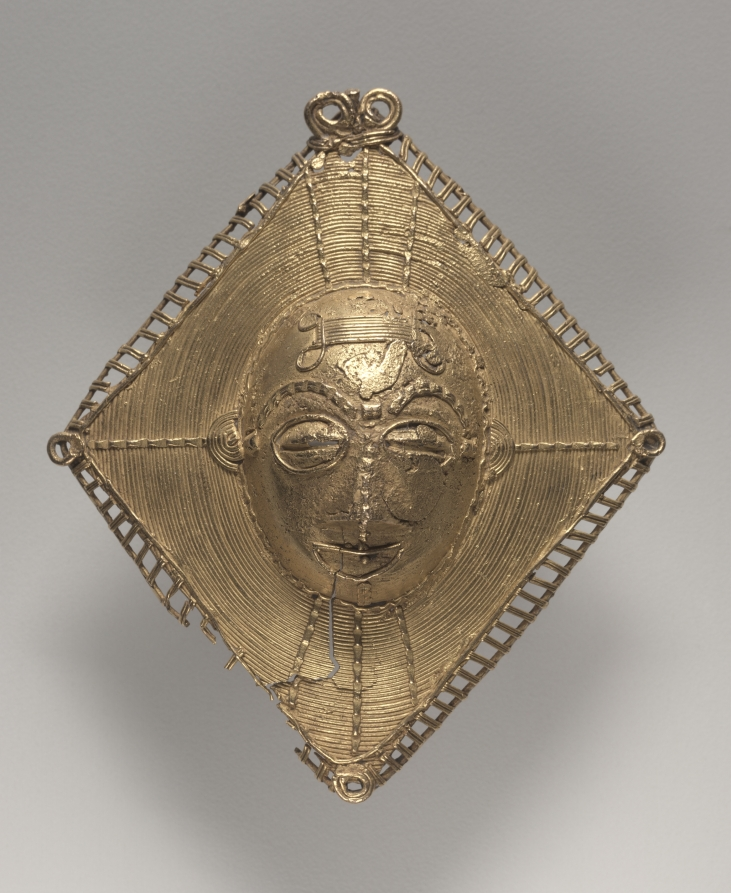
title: Pendant: Face in Diamond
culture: Africa, West Africa, Côte d'Ivoire, probably Baule-style goldsmith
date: 1900s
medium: Gold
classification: Jewelry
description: These pendants were cast in gold using the lost-wax method. Gold objects are the only Baule art forms associated with ancestor spirits. Usually hidden in pots or suitcases, gold adornments are displayed on important occasions such as funerals. They are laid out around the corpse before burial. A widow will wear them on a chain around her neck or attached to her hair at the ceremony signaling the end of mourning.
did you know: This pendant may be an idealized portrait that the person who wore it knew.